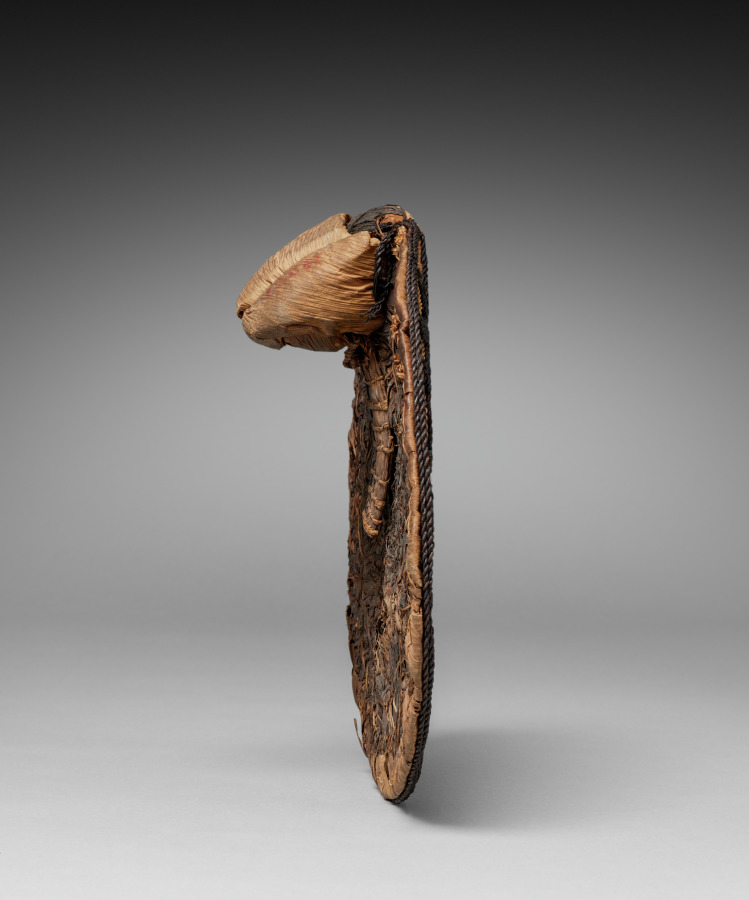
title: Back Skirt/Sitting Pad (negbe)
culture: Africa, Central Africa, Democratic Republic of Congo, Mangbetu-style makers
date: by 1928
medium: Plant fibers and dye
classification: Garment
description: Egbe (singular: negbe) were fashionable and practical garments aristocratic Mangbetu women made for special occasions. Worn over a skirt, it tied onto a girdle along with a frontal “apron.” The curved interior piece rested on the lower back. Thickly woven, flexible natural fibers bent with the body, cushioning the wearer’s behind when sitting. When the woman was standing, the decorated flat portion faced outward, showing off bold geometric motifs. Egbe were among items sold to foreigners at the Mangbetu king’s encouragement as the Mangbetu actively constructed their self image for outsiders during the 1920s and 1930s.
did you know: A contemporary fashion in 1929, when it was purchased or collected, this egbe is now a historical document of past styles.